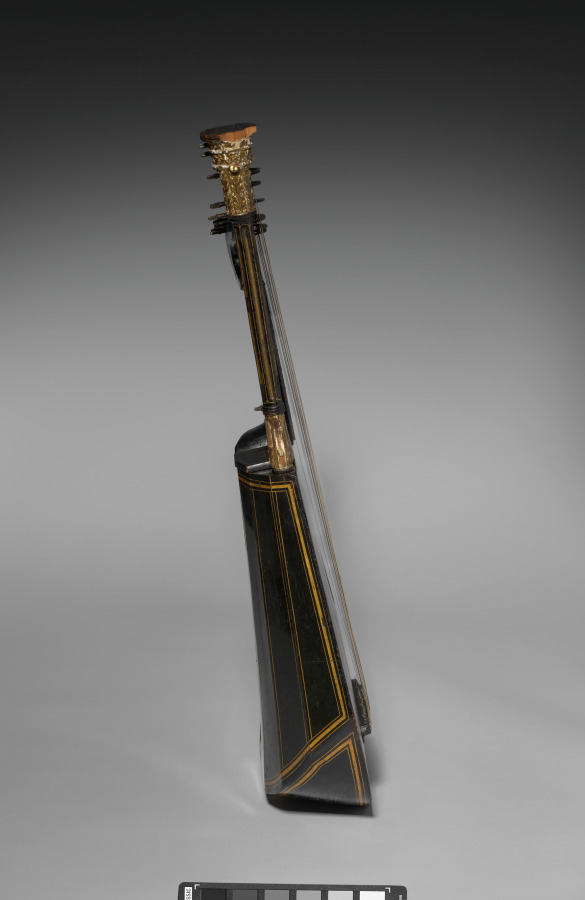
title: Harp-Lute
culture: England, London, 18th century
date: 1700s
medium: varnished wood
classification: Musical Instrument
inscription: the maker's name is illegible, but the number of the instrument is 14.